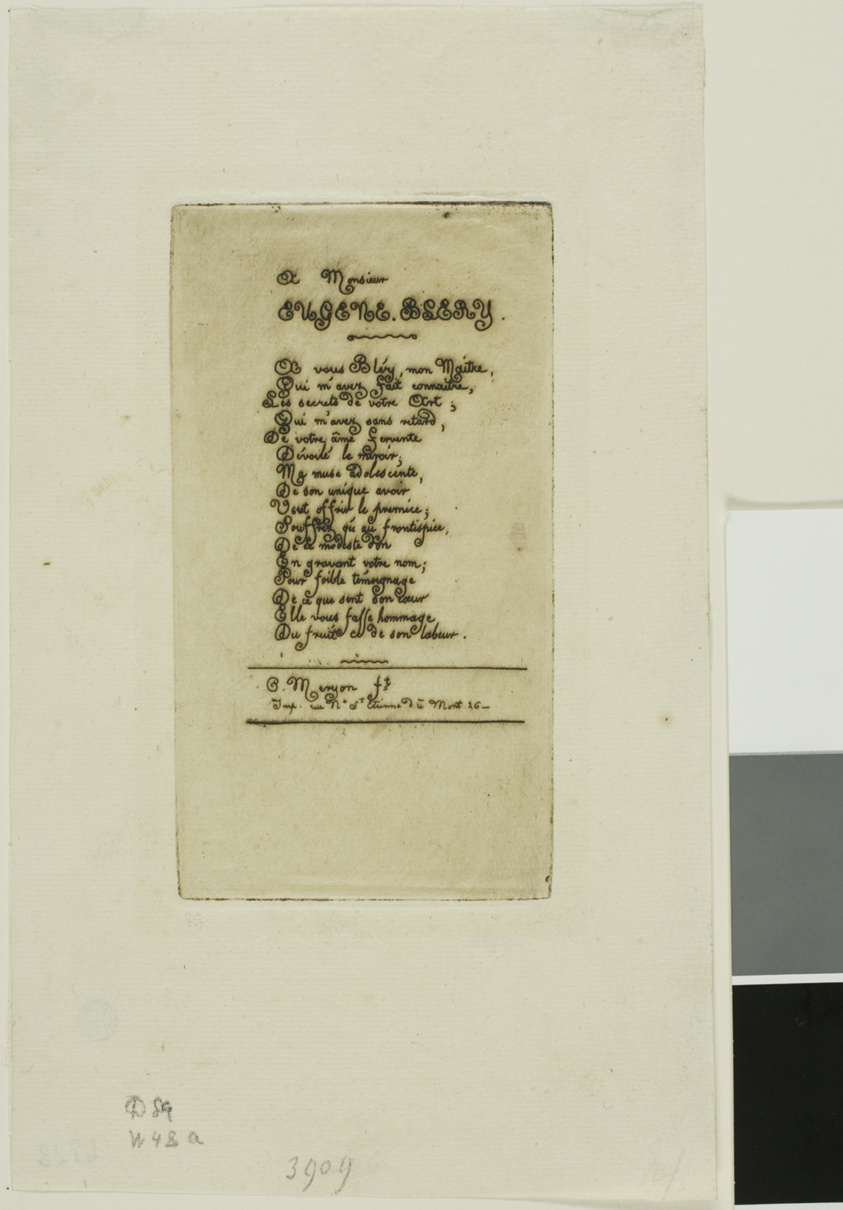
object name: Print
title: Verses Dedicated to Eugène Bléry, No. 2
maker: Charles Meryon (French, 1821-1868)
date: 1854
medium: Etching in warm black on ivory laid paper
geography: France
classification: etching; print; prints and drawing